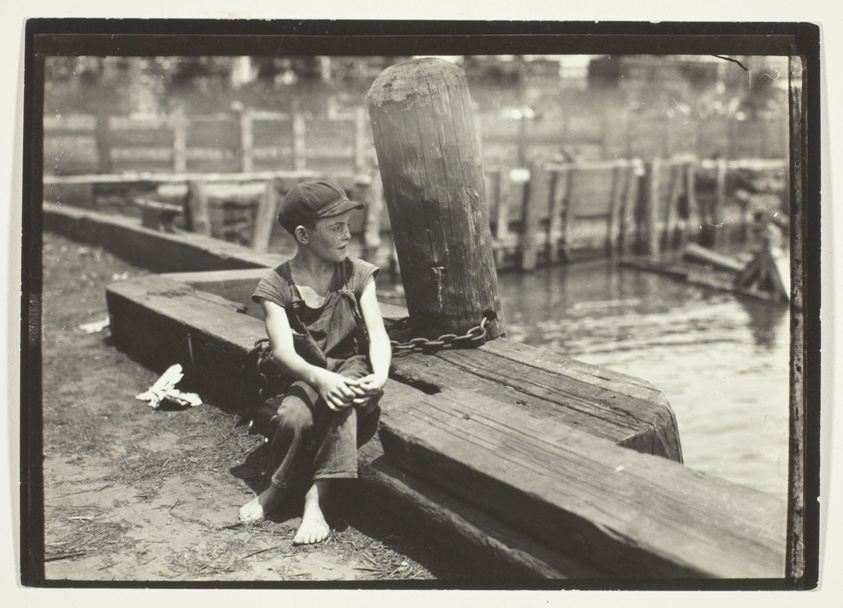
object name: Photograph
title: Down On The Wharf, New York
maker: Lewis Wickes Hine (American, 1874–1940)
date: c. 1910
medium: Gelatin silver print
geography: United States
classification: gelatin silver (developing-out-paper) pr; photographic process; photography; photograph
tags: Collected by Hugh Edwards